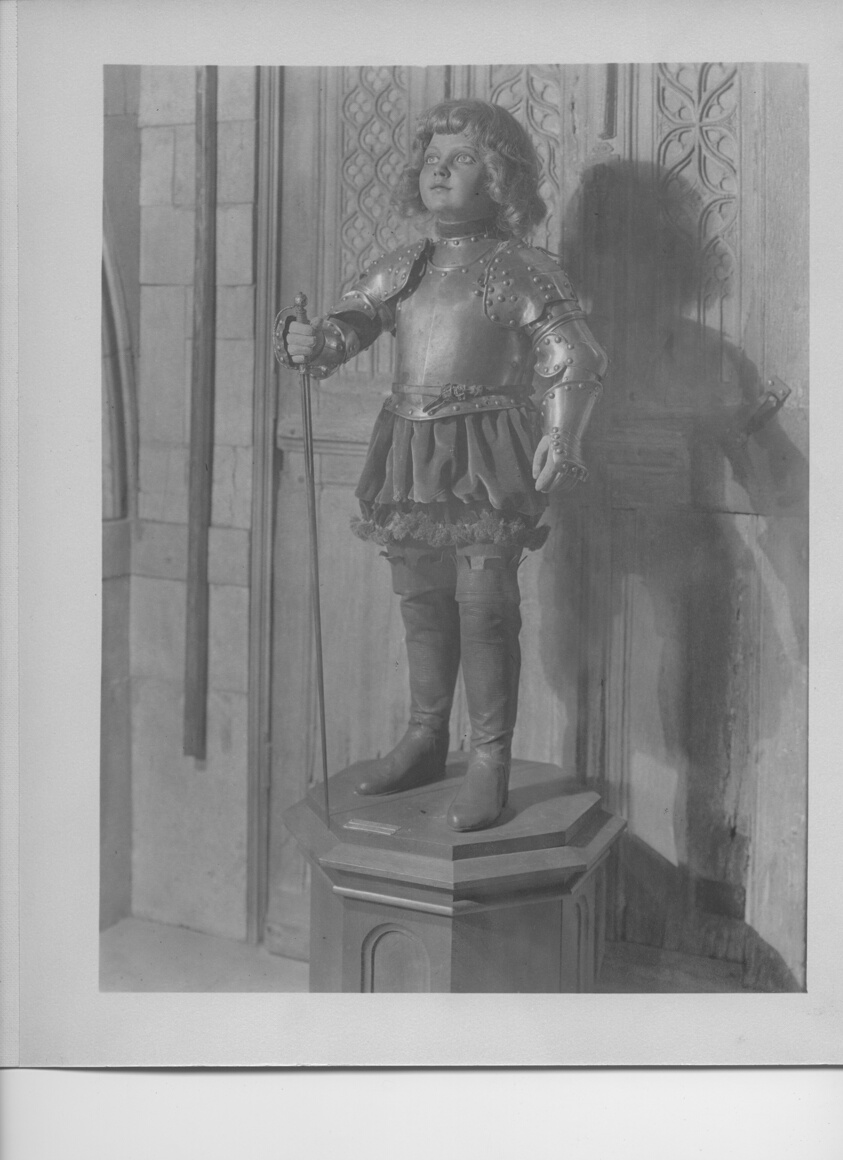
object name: Armor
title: Boy's Armor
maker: Western European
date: late 17th century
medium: Steel, brass, and leather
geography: France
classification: suit; armor; arms and armor